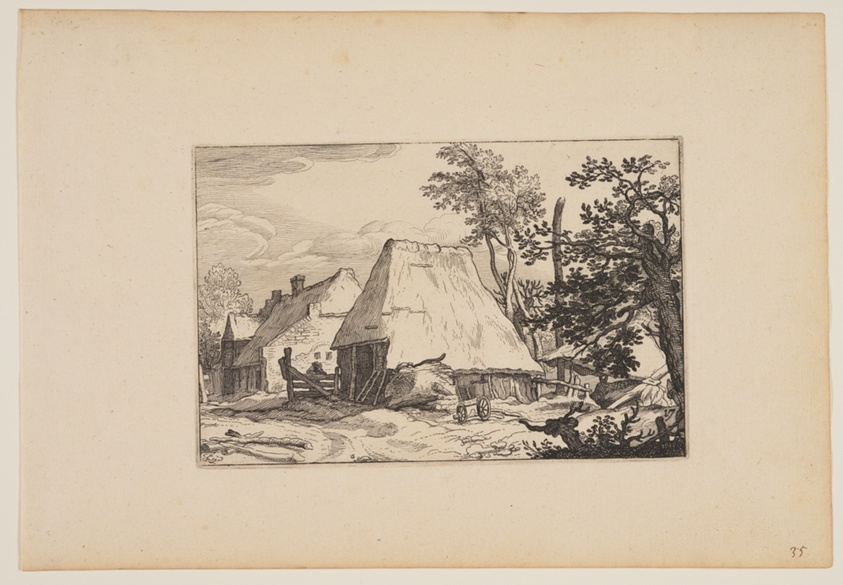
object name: Print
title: Farmyard, Man Resting on a Fence left of Centre, from Landscapes (Verscheyden aerdige Lanthuysen...)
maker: Claes Jansz. Visscher (Netherlandish, c. 1550–c. 1612); after Abraham Bloemaert (Dutch, 1566–1651)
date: 1620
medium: Etching on ivory laid paper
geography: Netherlands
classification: print; paper; prints and drawing; etching